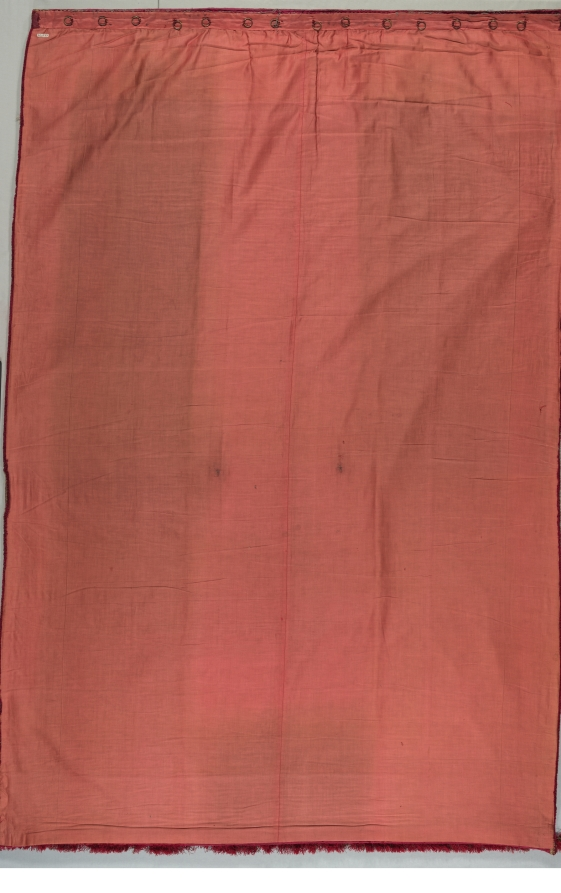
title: Curtain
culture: Italy, 17th century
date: 1600s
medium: silk velvet with metal thread embroidered valance and passementerie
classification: Embroidery